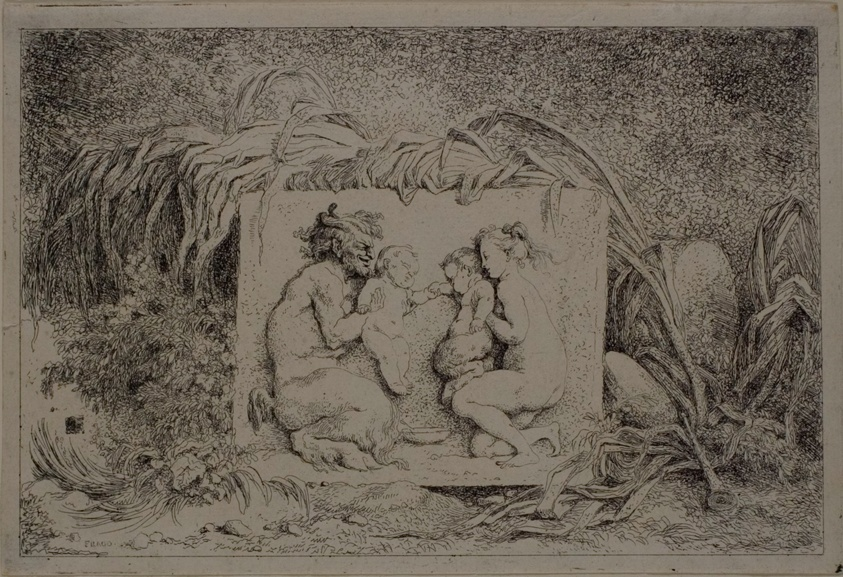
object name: Print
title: Satyr's Family from Bacchanales, or Satyr's Games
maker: Jean-Honoré Fragonard; French, 1732-1806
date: 1763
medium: Etching on ivory laid paper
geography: France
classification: etching; print; prints and drawing